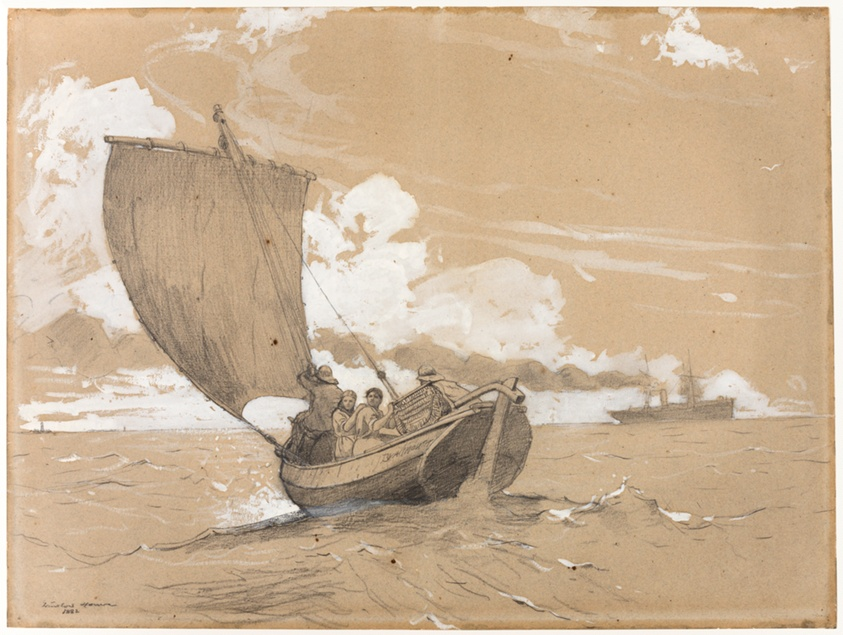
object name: Drawing and Watercolor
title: Fishing off Scarborough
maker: Winslow Homer (American, 1836-1910)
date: 1882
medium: Graphite and opaque white watercolor, with traces of black chalk, on medium weight, slightly-textured, tan laid paper with blue and red fibers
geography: United States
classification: graphite; drawings (visual works); prints and drawing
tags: women, people, boats, fishing